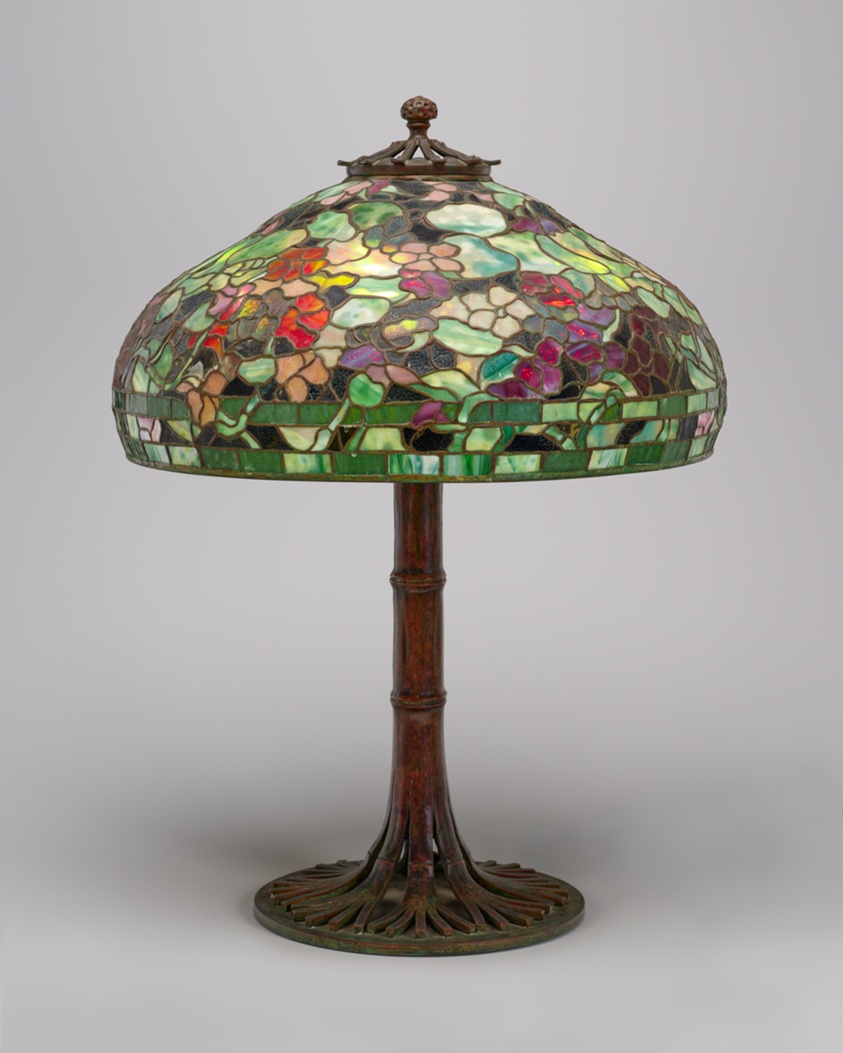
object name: Furnishings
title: Lamp with “Nasturtium” Shade and “Bamboo” Base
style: Arts and Crafts Movement, 20th Century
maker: Design attributed to Clara Pierce Wolcott Driscoll (American, 1861–1944); Tiffany Studios (American, 1902–32); Corona, New York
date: c. 1910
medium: Favrile glass and bronze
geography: Corona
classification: lamp (lighting device); american decorative arts; decorative arts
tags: Nasturtium, bamboo